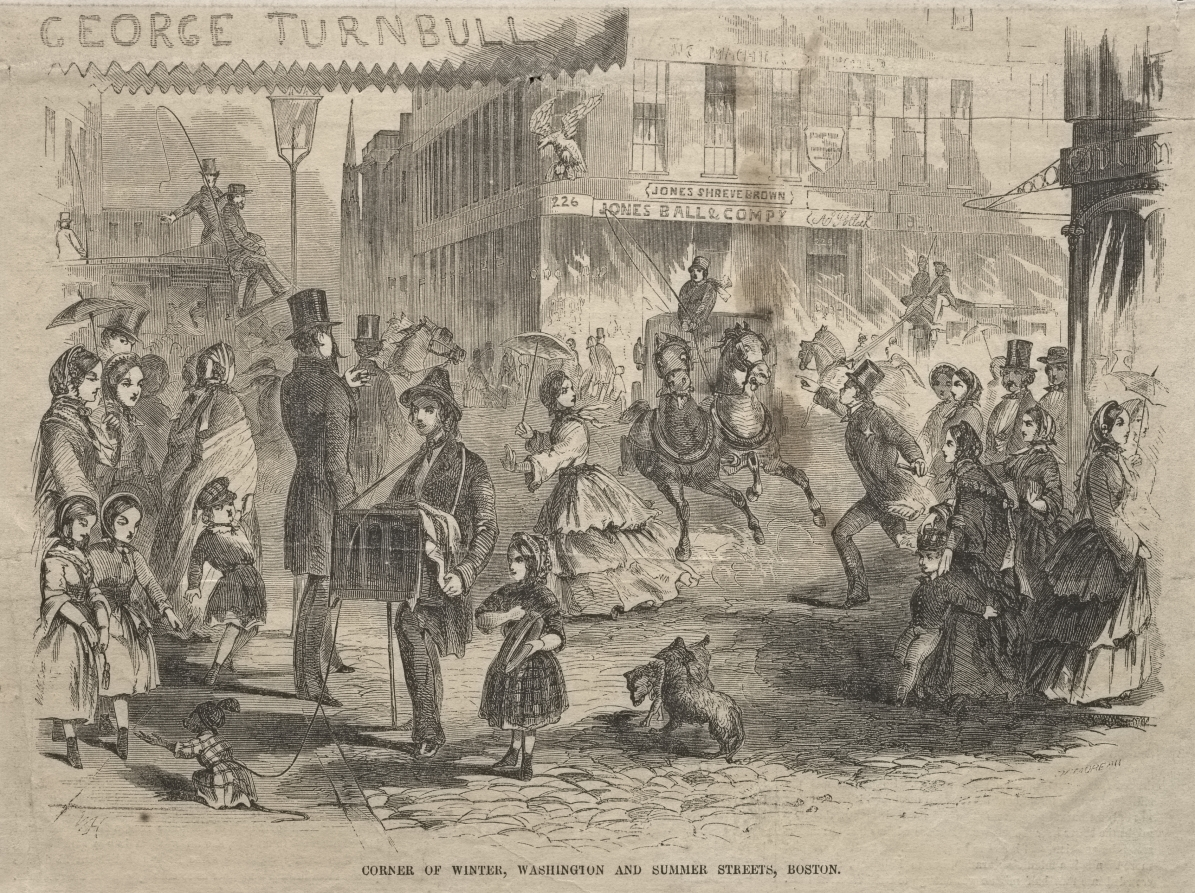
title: Corner Winter, Washington and Summer Streets, Boston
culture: America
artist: Winslow Homer (American, 1836–1910)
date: 1857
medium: wood engraving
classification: Print